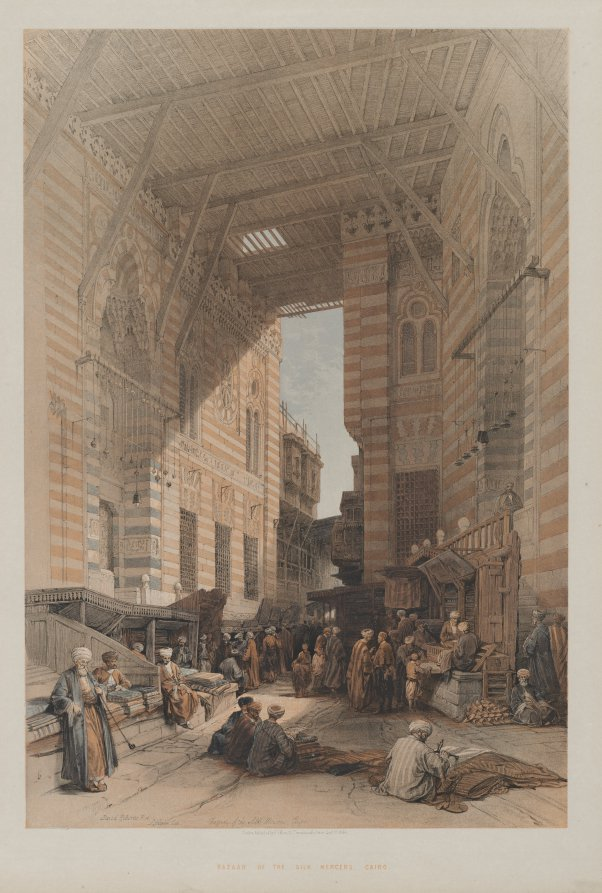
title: Egypt and Nubia, Volume III: Bazaar of the Silk Mercers, Cairo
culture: England, 19th century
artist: Louis Haghe (British, 1806–1885)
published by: F. G. Moon, 20 Threadneedle Street, London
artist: after David Roberts (Scottish, 1796–1864)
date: 1848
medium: color lithograph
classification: Print